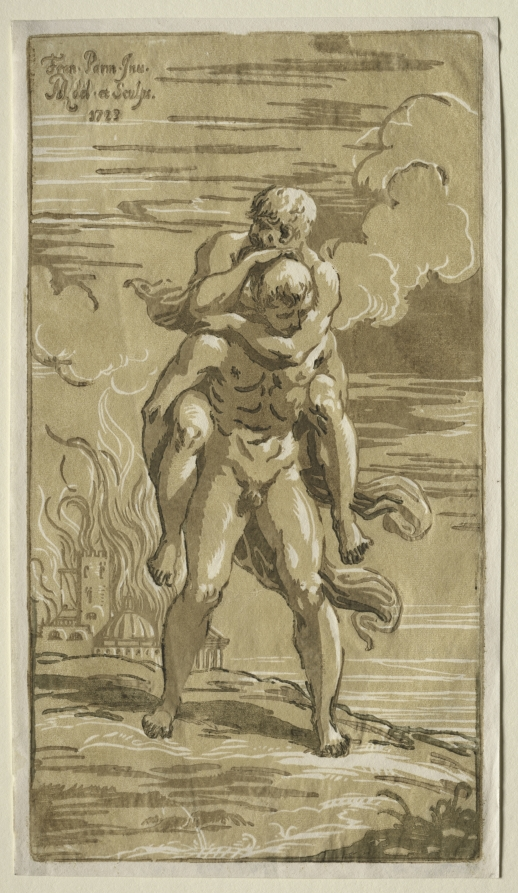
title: Eneas Carrying Anchises, his Father, from the Burning of Troy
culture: Italy, 18th century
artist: Antonio Maria I Zanetti (Italian, 1680–1757)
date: 1723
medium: chiaroscuro woodcut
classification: Print